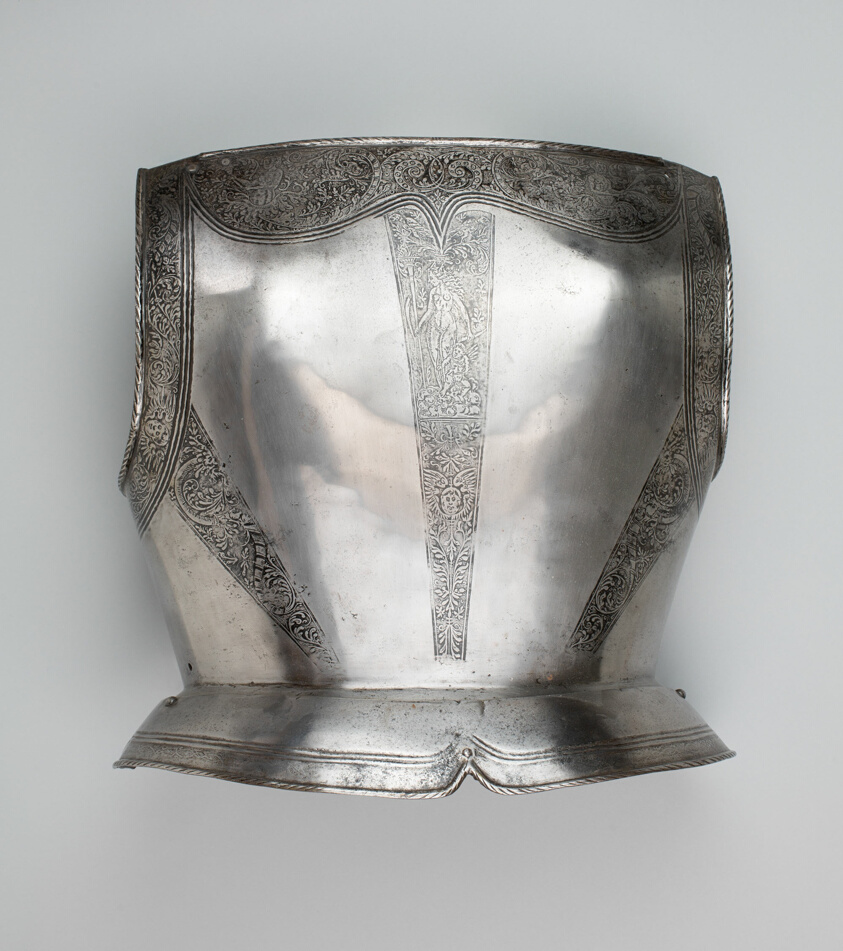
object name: Armor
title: Backplate with Associated Culet of One Lame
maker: German, Brunswick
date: c. 1560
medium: Steel, etched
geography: Northern Germany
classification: suit-element; armor; arms and armor